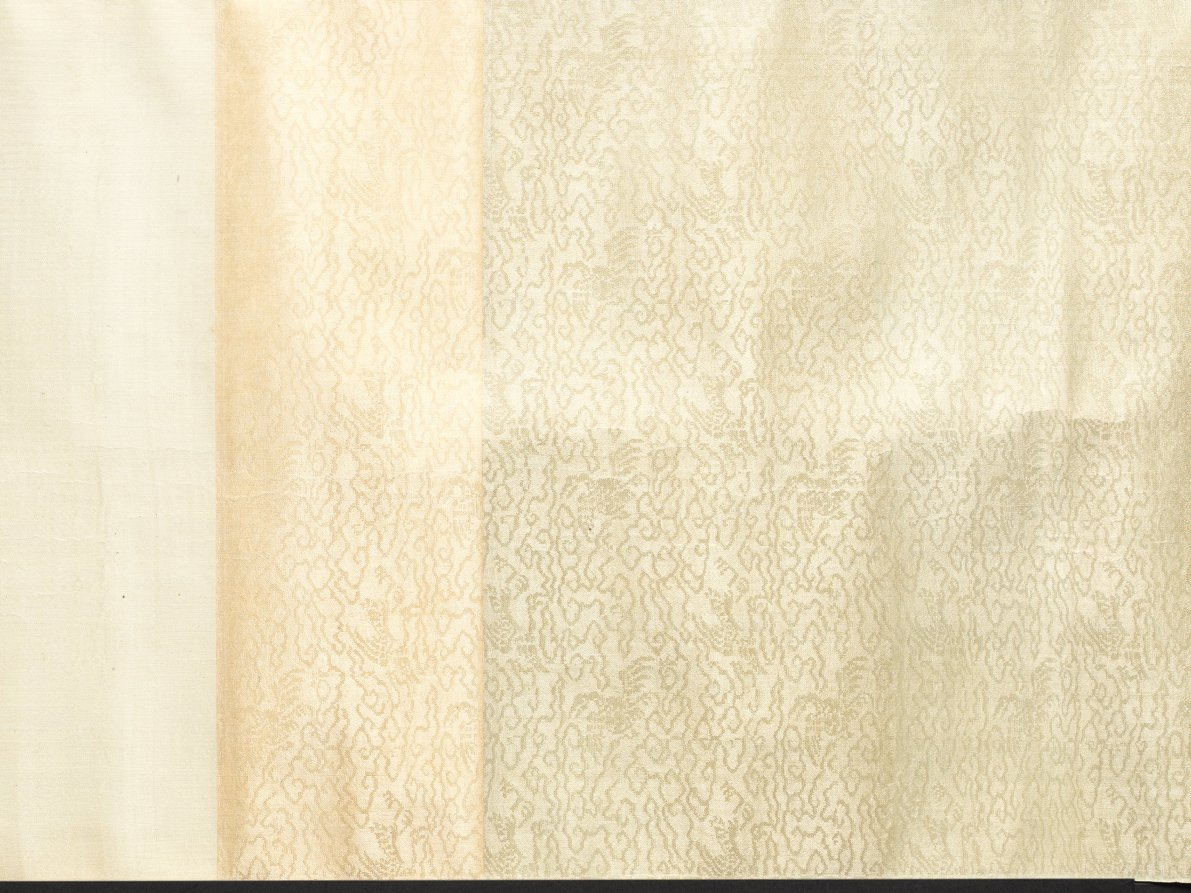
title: Fisherman's Joy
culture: China, Ming dynasty (1368–1644)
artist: Qian Gu (Chinese, 1508–c. 1578)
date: 1572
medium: Handscroll; ink and light color on paper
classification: Painting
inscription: Artist's inscription, signature, and seal: On the autumn day of the jen-shen year [1572], P'eng-ch'eng, Ch'ien Ku painted [this]. [seal] Hsüan-ch'ing shih. 2 colophons, both dated 1689, and 5 additional seals of Yün Shou-p'ing (1633-1690).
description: This painting has a scene showing two small crafts, each manned by two fishermen, practicing a traditional fishing method. In one of them, a man uses a bamboo pole to direct the movements of a cormorant bird sent into the water. Cormorant fishing, witnessed in some areas of the lower Yangzi River, appears in Zhe school paintings. Qian Gu may have borrowed these narrative figure scenes from Zhe school paintings, while his vantage point, brushwork, and soft tones align with the Wu school style. Scenes of fishermen appealed to urban and educated audiences who idealized the self-sufficient independence of fisherfolk.